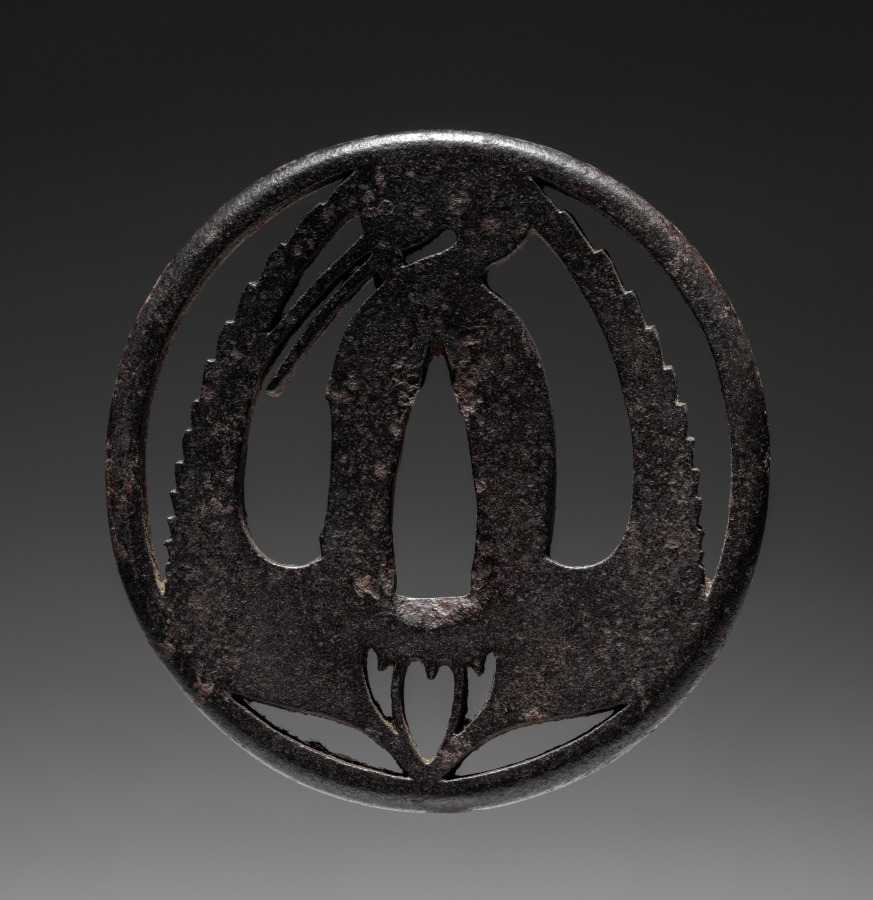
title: Sword Guard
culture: Japan, Edo period (1615–1868)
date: 1615–1868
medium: iron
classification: Arms and Armor